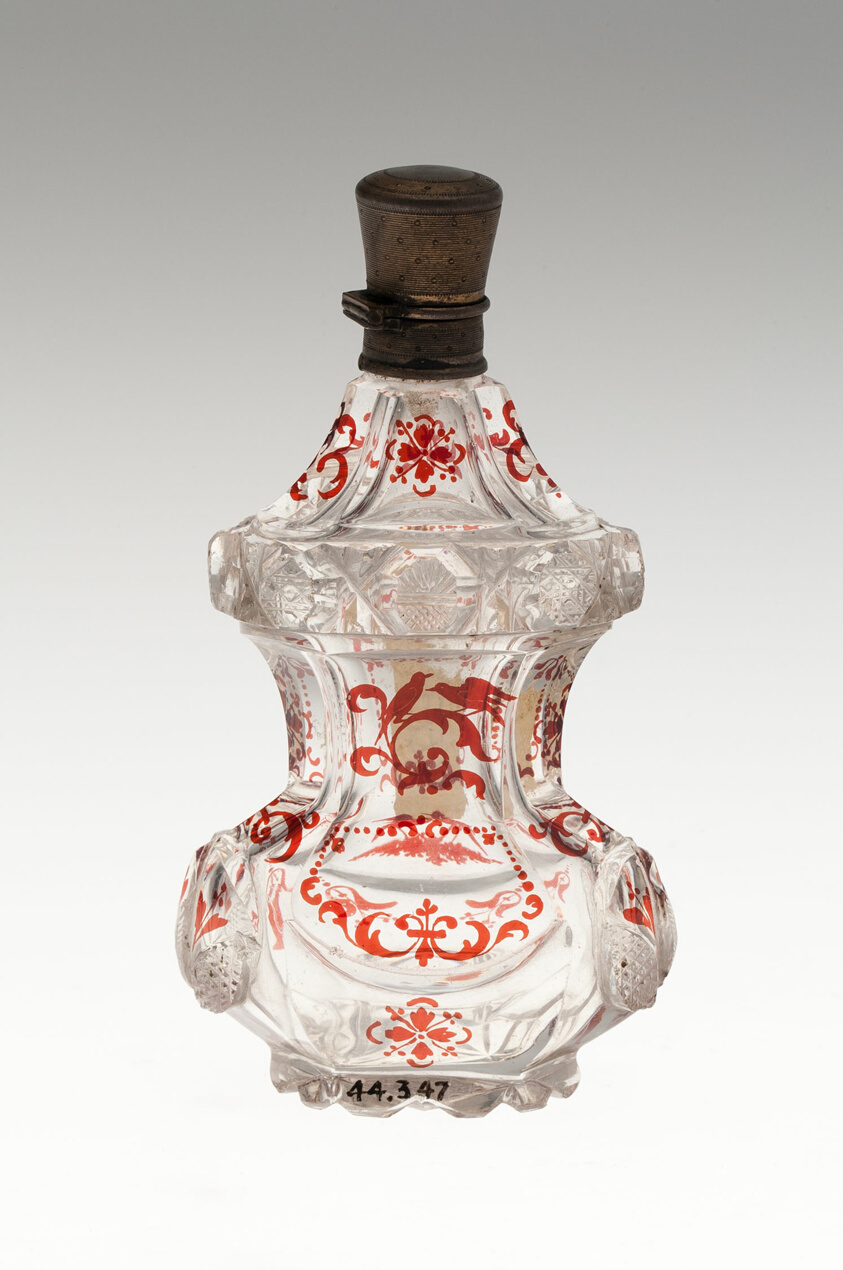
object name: Glass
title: Scent Bottle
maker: Bohemia, Czech Republic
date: c. 1840/50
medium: Glass; cut and colored with metal mounts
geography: Bohemia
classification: glass; european decorative arts